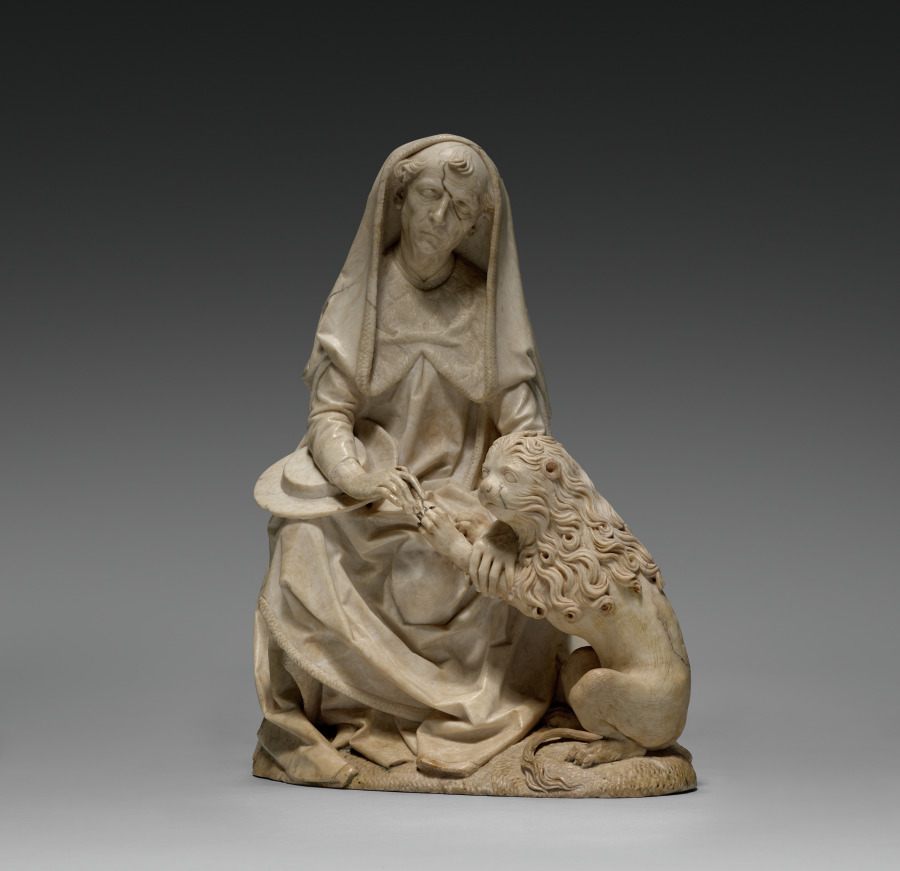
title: Saint Jerome and the Lion (From the former Church of St. Peter in Erfurt)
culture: Germany, Würzburg, late 15th Century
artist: Tilman Riemenschneider (German, active Würzburg, c. 1460–1531)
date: c. 1495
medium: alabaster, traces of polychromy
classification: Sculpture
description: According to legend, Saint Jerome (347–420 bce) lived in the desert, where he removed a thorn from an injured lion. Jerome is venerated in the Catholic Church as a Church Father, an important early author of Christianity. Here, he wears cardinal’s clothing from around 1500. Tilman Riemenschneider focused on Jerome’s relationship with the lion, creating empathy for the wounded animal. The delicacy of the depiction, which may have been partially painted to add highlights, is typical of alabaster, as is its fine polishing. The cord of the cardinal’s hat, missing today, may have been supplemented from another material.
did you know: In the story Saint Jerome encounters a fearsome lion, here depicted as diminutive, gentle, and submissive.